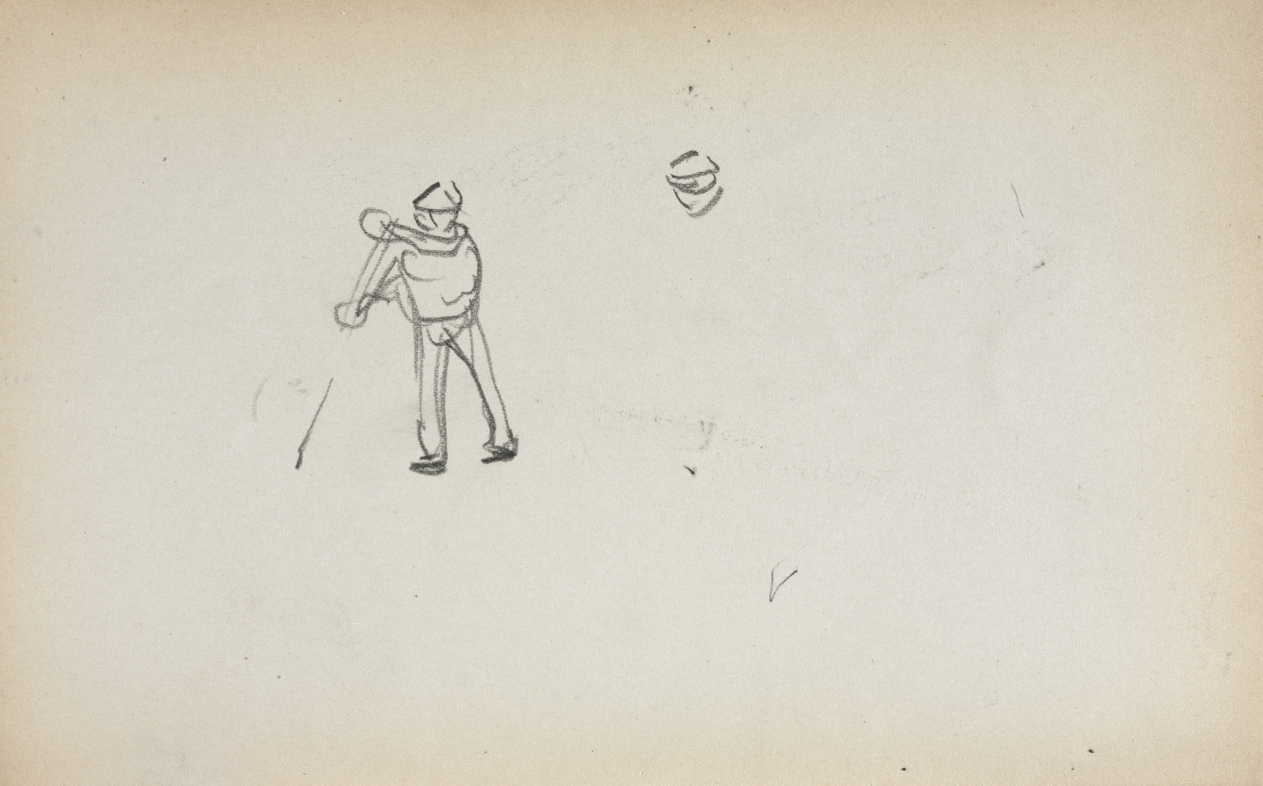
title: Italian Sketchbook: Gondolier (page 13)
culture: America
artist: Maurice Prendergast (American, born Newfoundland [now Canada], 1858–1924)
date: 1898–1899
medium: pencil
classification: Bound Volume